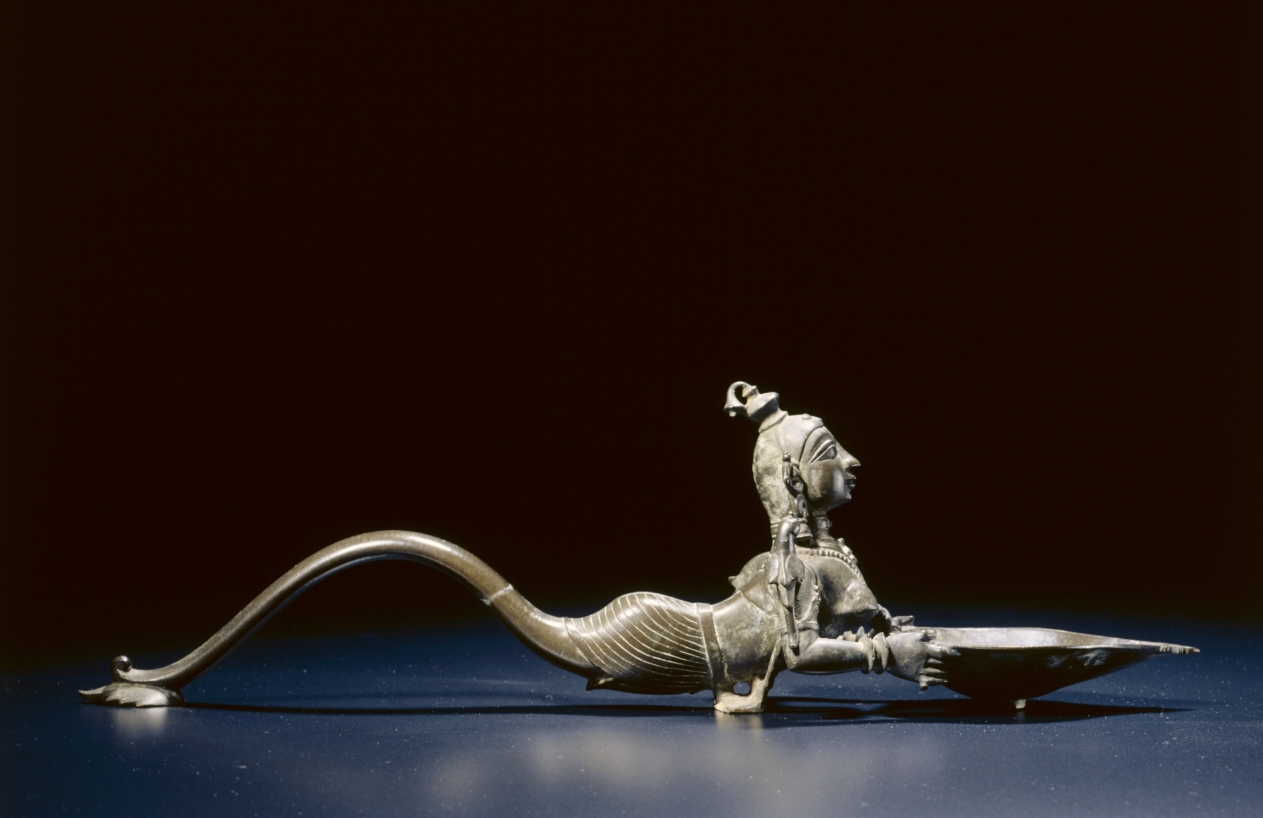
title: Votive Lamp (Deepa Lakshmi)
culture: South India, Chingleput district (Madras), 18th-19th Century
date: 1700s-1800s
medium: bronze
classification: Sculpture